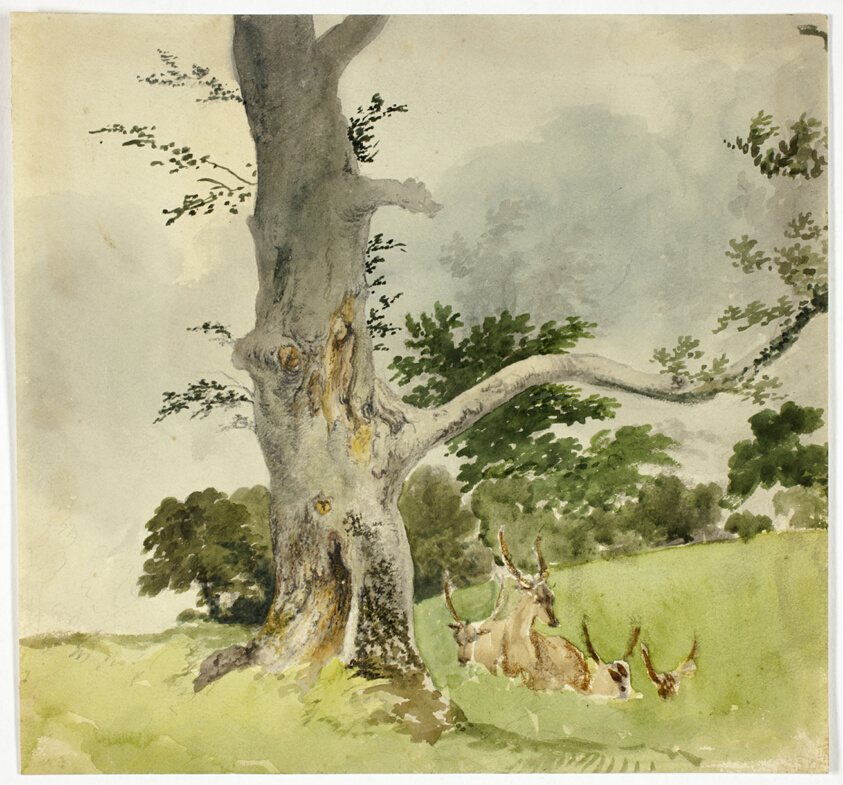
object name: Drawing and Watercolor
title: Family of Deer under a Tree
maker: Attributed to Robert Hills; English, 1769-1844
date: 1790-1844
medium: Watercolor with graphite on cream wove paper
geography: England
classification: watercolor; drawings (visual works); prints and drawing